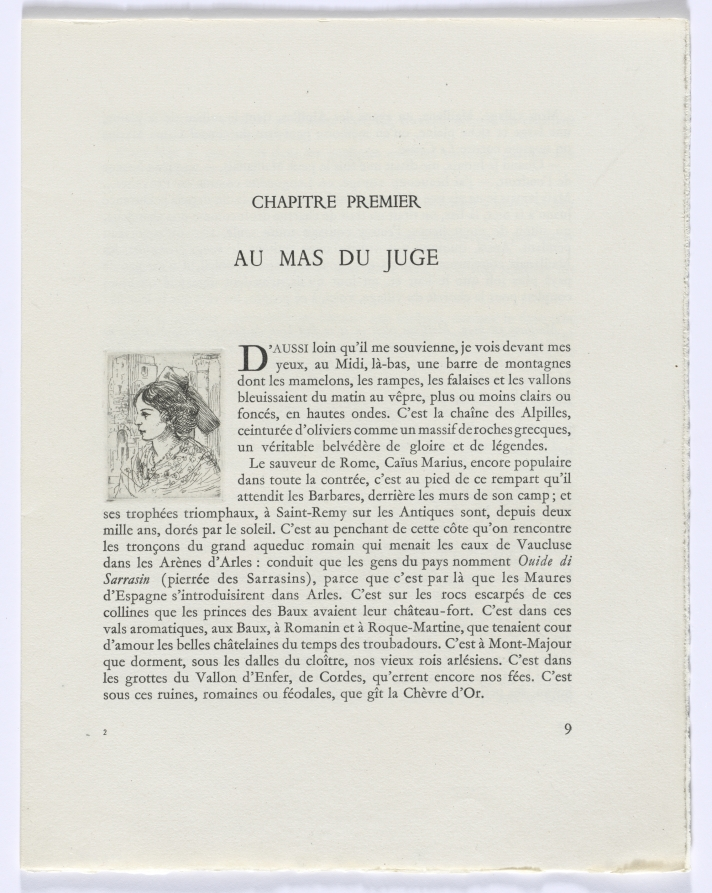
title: Frédéric Mistral: Mémoires et Recits by Frédéric Mistral: bust of woman in profile (page 9)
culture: France, 20th century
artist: Auguste Brouet (French, 1872–1941)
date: 1937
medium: etchings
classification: Portfolio